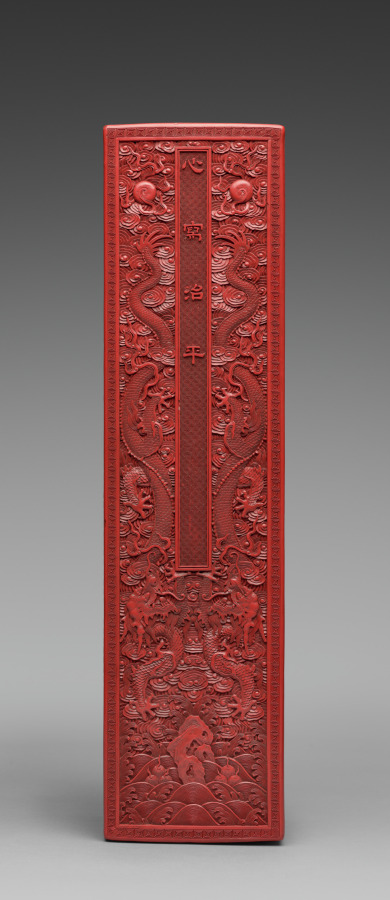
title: Cover for a Carved Lacquer Scroll Box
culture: China, Qing dynasty (1644–1911), Qianlong reign (1736–95)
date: 1736–95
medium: cinnabar carved lacquer on wood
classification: Lacquer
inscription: 心寫治平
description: The elaborate design, superior craftsmanship, and inscription carved into the red cinnabar lacquer proclaim the imperial pedigree of this scroll box. On either end appears a five-clawed dragon, a design reserved only for an emperor. More dragons twist and wind through swirling clouds and waves along the length of the box’s sides and top. The carving is intricate and vigorous, while the design is controlled and regular. This box originally housed the handscroll, CMA 1969.31, private portraits of the Emperor Qianlong, his empress, and 11 other favorites among his presumed 40 or more wives during his 60-year reign.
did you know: This is the original box for the handscroll Portraits of the Qianlong Emperor and His Twelve Consorts, CMA 1969.31.